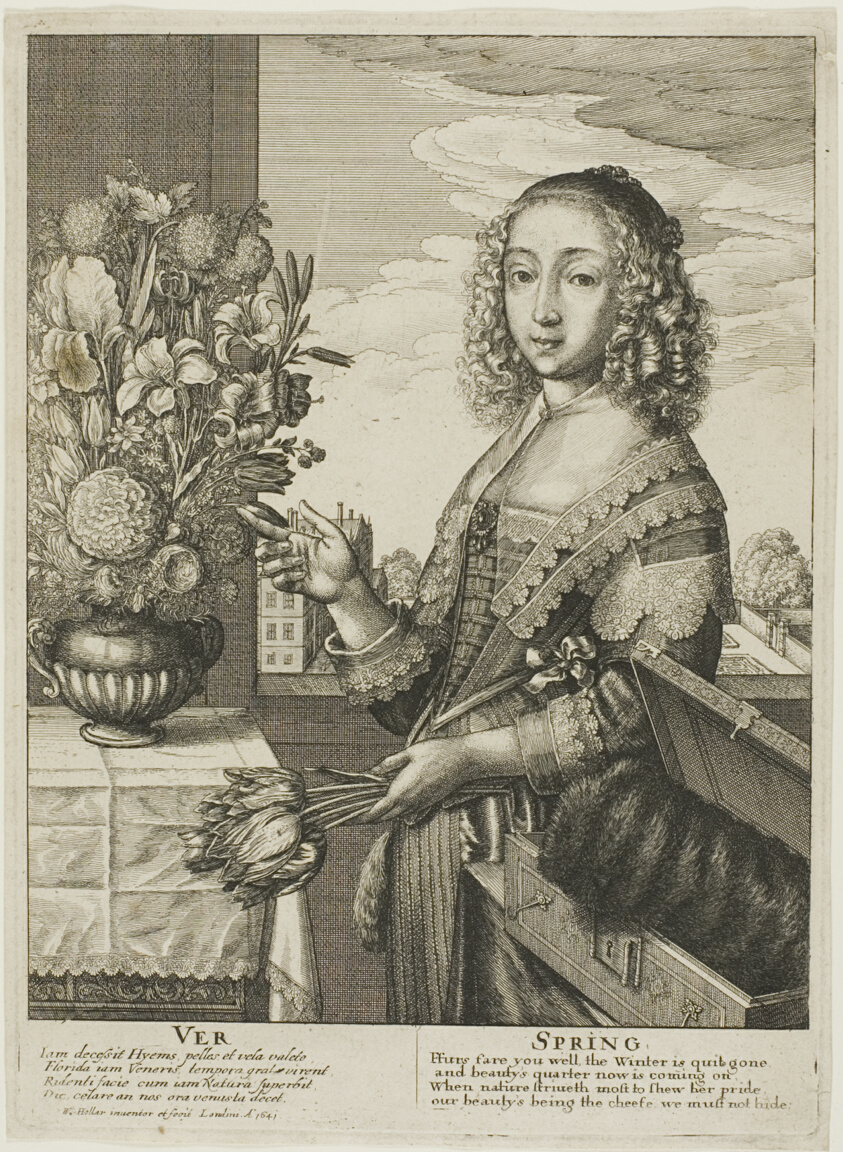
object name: Print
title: Spring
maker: Wenceslaus Hollar (Bohemian, 1607-1677)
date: 1641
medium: Etching on off white laid paper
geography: Bohemia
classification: etching; print; prints and drawing